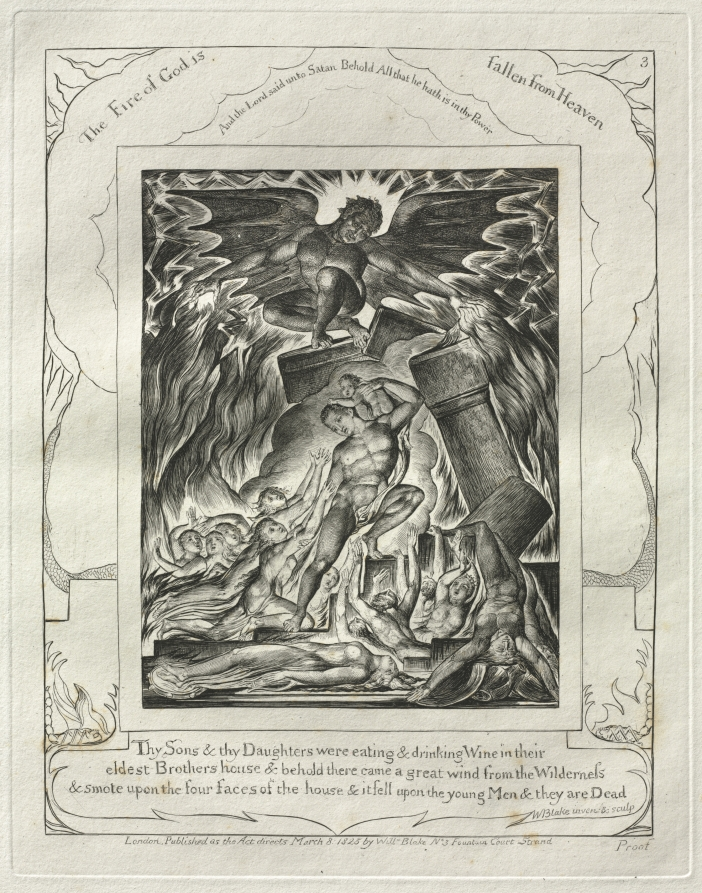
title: The Book of Job: Pl. 3, Thy Sons and thy Daughters were eating and drinking Wine in their / eldest Brothers house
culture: England, 18th century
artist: William Blake (British, 1757–1827)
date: 1825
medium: engraving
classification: Portfolio